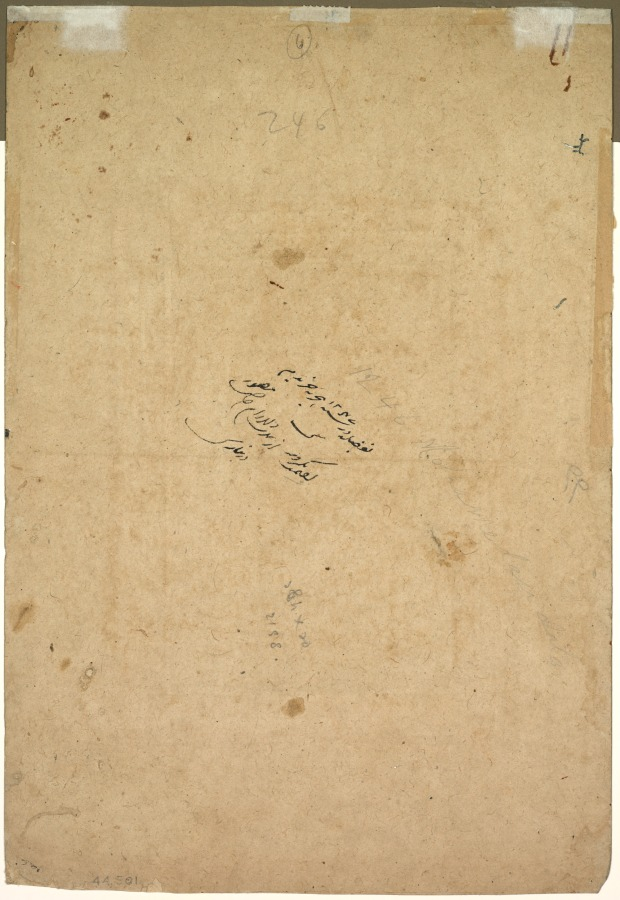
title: Rooster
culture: India, Mughal, 17th century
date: c. 1620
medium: Gum tempera, ink, and gold on paper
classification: Painting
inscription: verso, upper center: Dilaram Pandit Kashmiri (by a later hand)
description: This bird, with its fierce expression, sharp beak, and spurred feet, may have been a champion in the cockfighting ring. The Mughal emperor Jahangir requested that his royal court artists paint portraits of remarkable birds and animals with as much realism as possible. He felt that such paintings enhanced feelings of amazement beyond hearing or reading an account.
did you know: This page belonged to the owner of Cleveland’s Leisy Brewing Company, est. 1873.